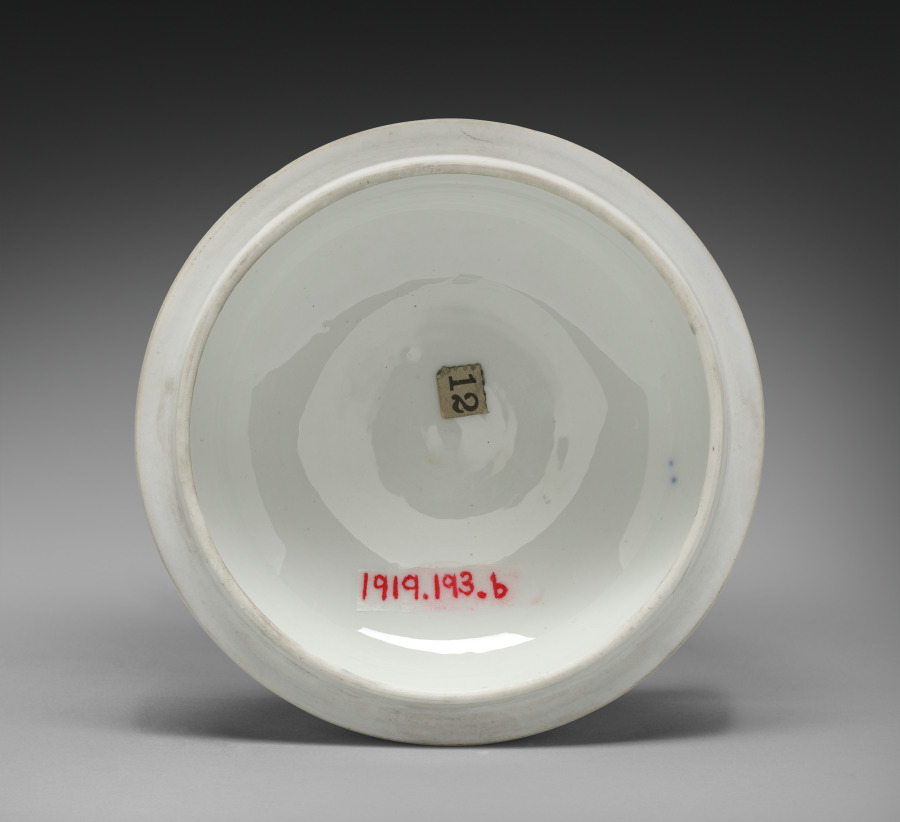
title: Cover for a Broth Bowl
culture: Germany, Meissen, 18th century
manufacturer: Meissen Porcelain Factory (German, est. c. 1710)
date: 1730–40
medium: gilt porcelain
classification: Ceramic